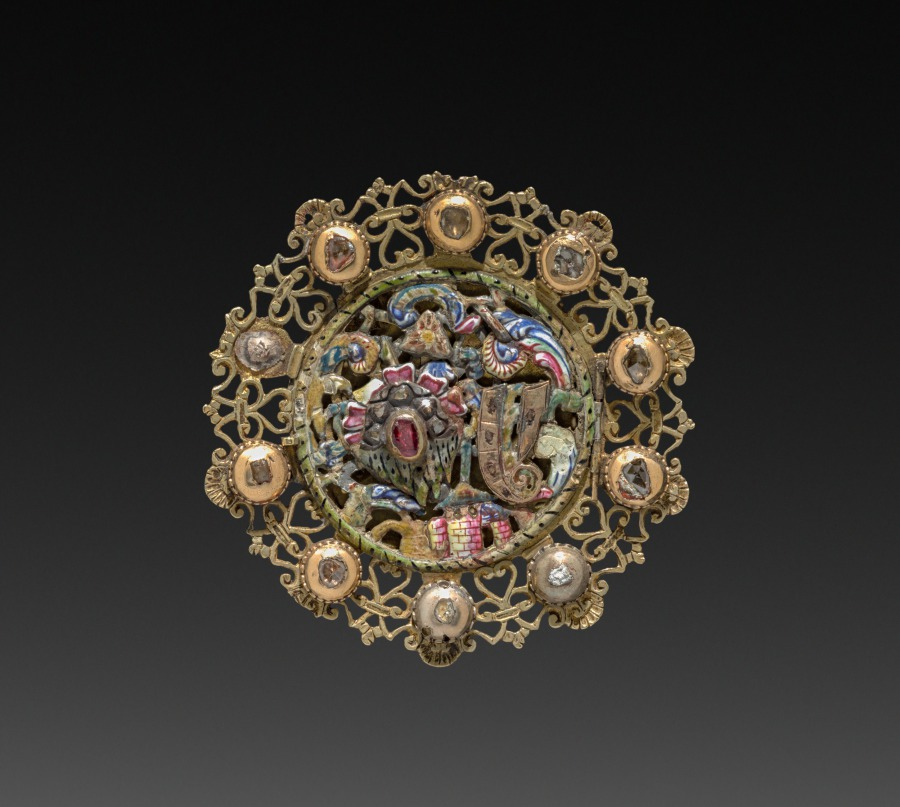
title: Pendant (part 1)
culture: Belgium, 18th century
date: 1700s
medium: silver gilt and enamel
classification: Metalwork